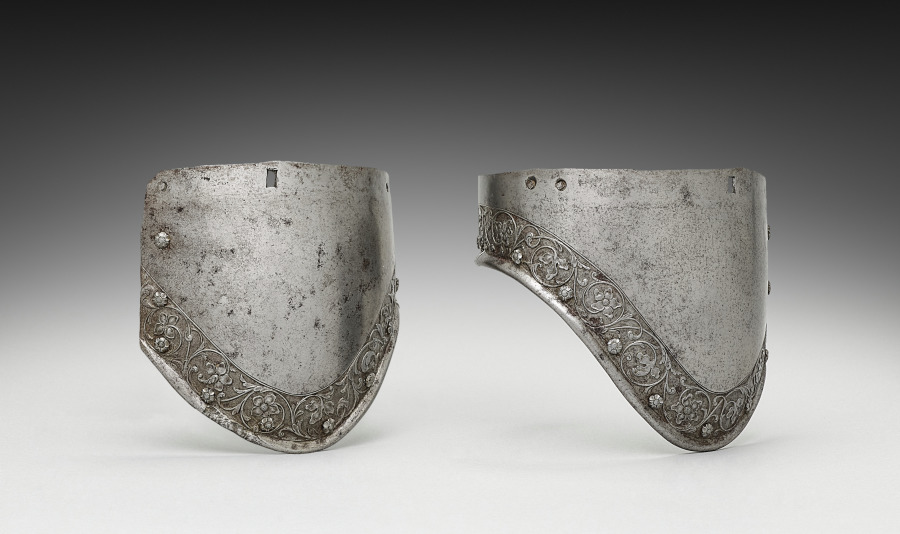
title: Pair of Upper Arm Canons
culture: Itlay, Milanese style of 16th century, probably 19th century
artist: attributed to Negroli Workshop (Italian, c. 1500–1561)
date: 1800s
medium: steel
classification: Arms and Armor